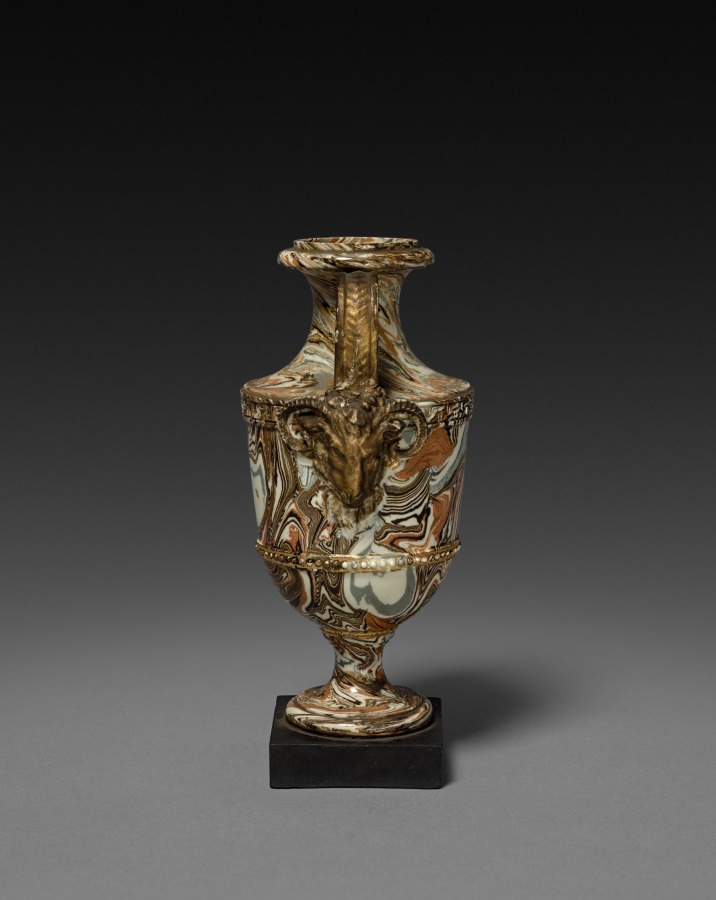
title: Urn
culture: England, late 18th or 19th century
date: late 1700s - 1800s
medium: earthenware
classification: Ceramic